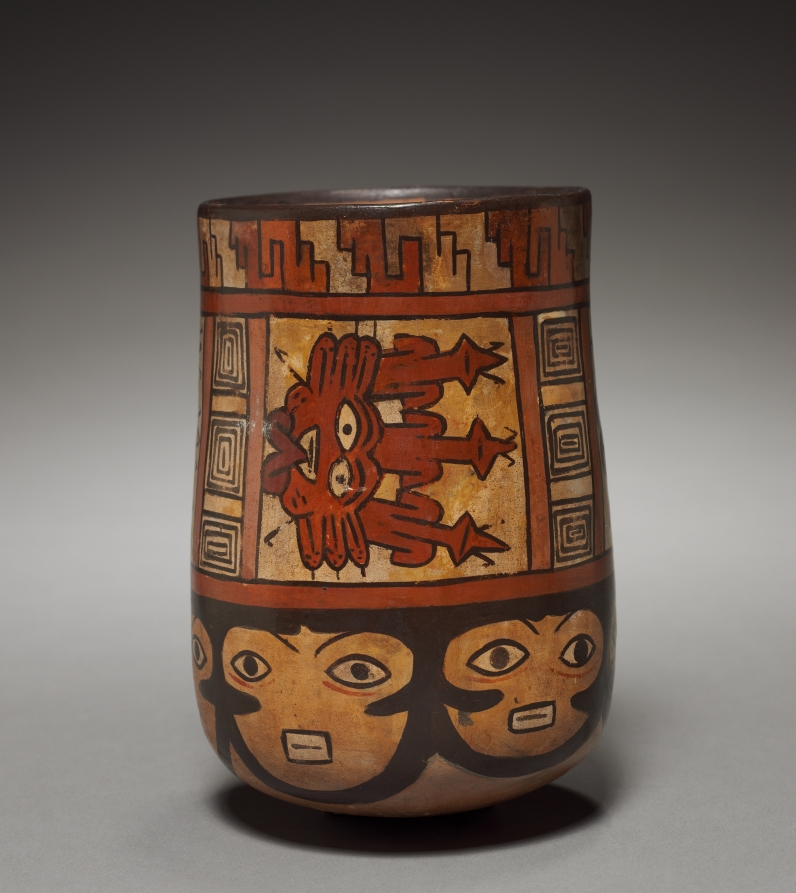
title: Vessel with Female Faces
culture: Peru, South Coast, Nasca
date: 100 BCE–700 CE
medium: earthenware with colored slips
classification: Ceramic